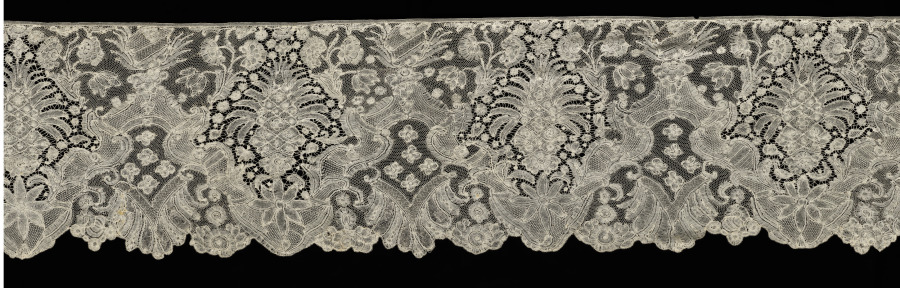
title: Lace Flounce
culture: Belgium, Brabant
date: 1700–1720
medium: Linen: bobbin lace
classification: Lace